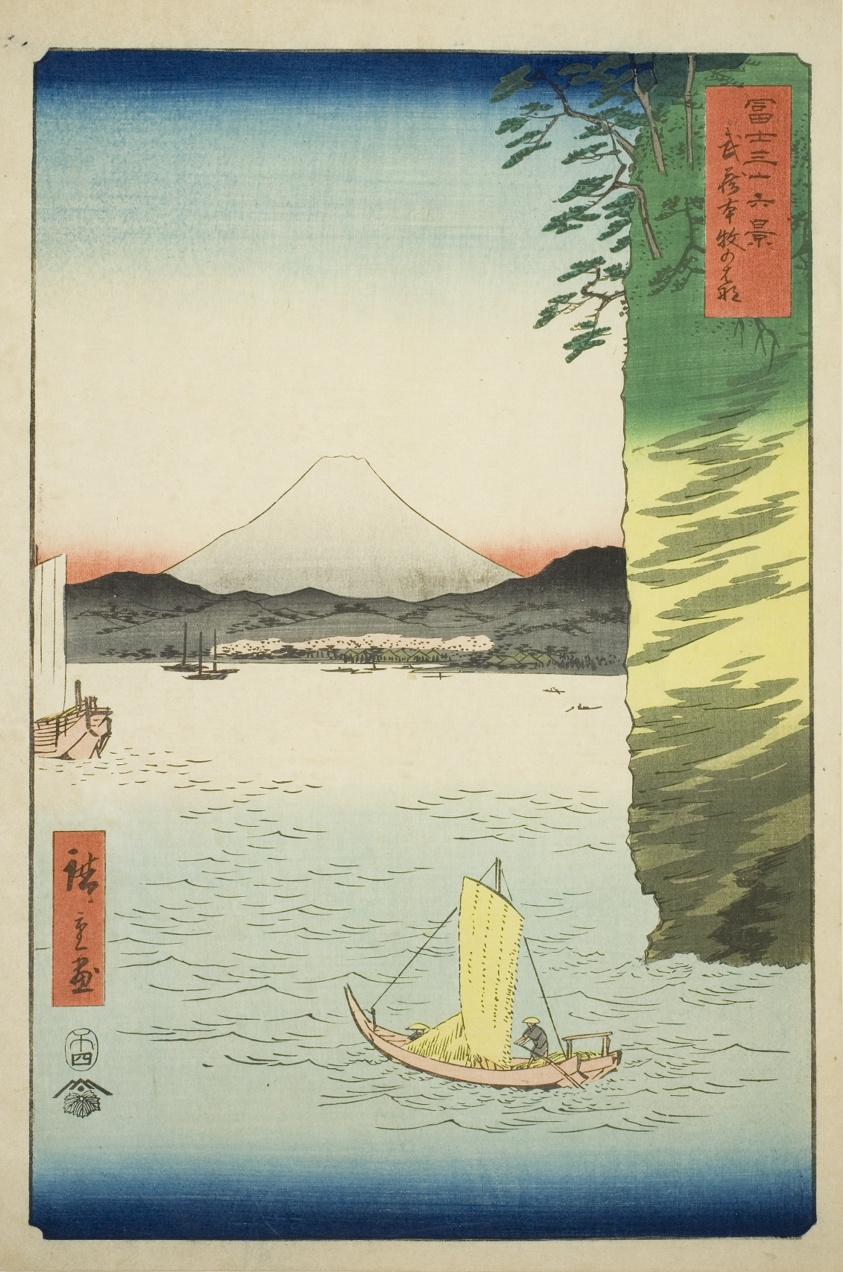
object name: Print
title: Honmoku in Musashi Province (Musashi Honmoku no hana), from the series "Thirty-six Views of Mount Fuji (Fuji sanjurokkei)"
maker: Utagawa Hiroshige 歌川 広重; Japanese, 1797-1858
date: 1858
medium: Color woodblock print; oban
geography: Japan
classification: woodblock print; print; asian art